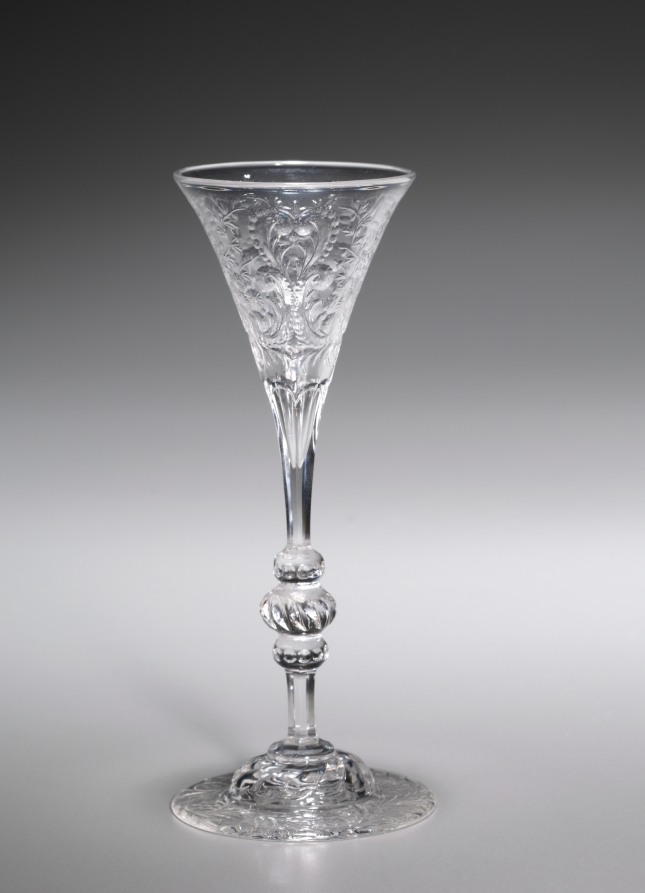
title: Glass from a Place Setting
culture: probably America, late 19th-early 20th century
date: c. 1890–1920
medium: glass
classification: Glass